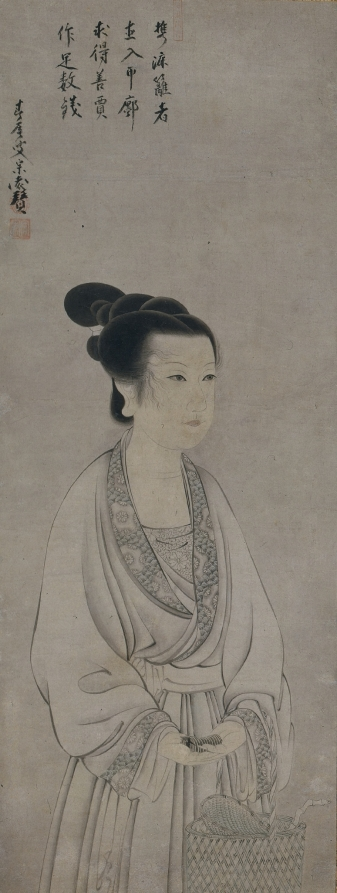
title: Rei Shōjo (Ling Zhaonu)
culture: Japan, Muromachi period (1392–1573)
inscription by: Shunoku Sōen (Japanese, 1529–1611)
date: 1500s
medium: hanging scroll, ink and light color on paper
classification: Painting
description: Legend has it that Chinese beauty Ling Zhaonu, whose name is pronounced Rei Shōjo in Japanese, was a model of devotion to her parents. She put great effort into selling baskets made by her elderly father, a devout Buddhist, thereby keeping the family afloat financially. The verse on the painting relates her story, and was inscribed by a Zen monk.